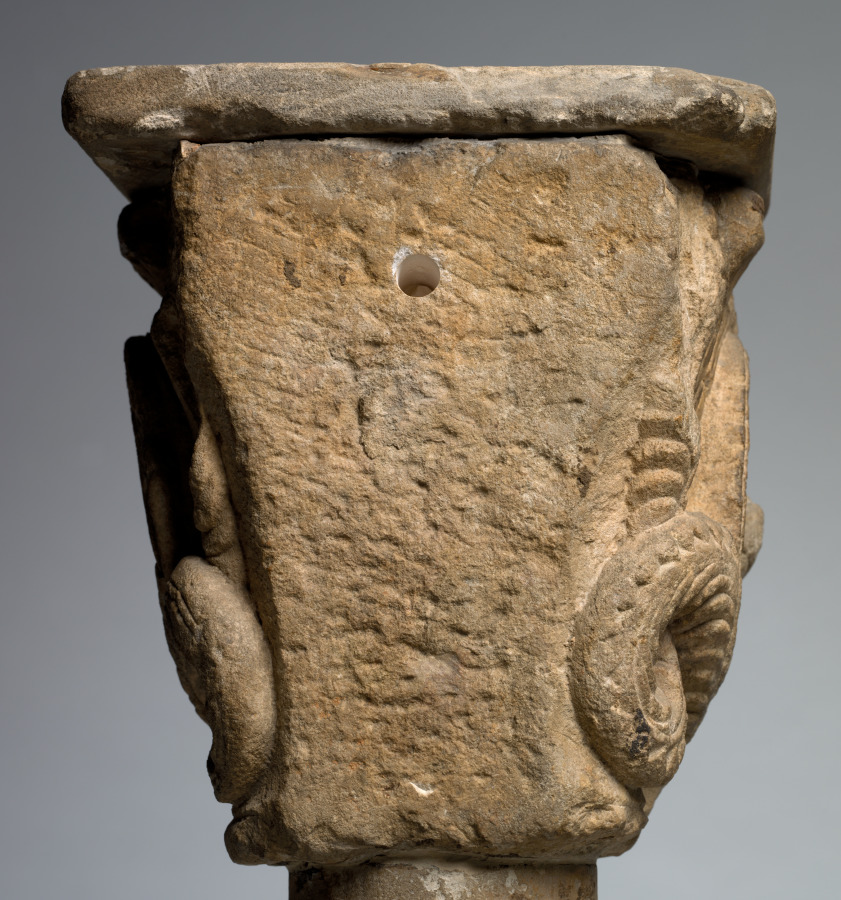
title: Engaged Capital with Birds and Dragons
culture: Western France, Bordelais or Dordogne, late 12th Century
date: late 1100s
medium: limestone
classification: Sculpture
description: Monstrous images were prevalent in the decoration of religious buildings during the Middle Ages. Such images must have impressed, perhaps even terrified, the monks and visitors who spent much of their time within the cloister or church, a place of prayer, contemplation, and reflection. Scholars have speculated how such images would have been received by the people given the ubiquity of monsters in medieval society. The carved monsters, often symbolizing vice and retribution for sin, were possibly designed to provoke a range of emotional responses including laughter, wonder, surprise, fear, and shock. This striking imagery must have had a strong impact, which in turn led Saint Bernard of Clairvaux (1090–1153), the spiritual head of the Cistercian order, to admonish their use as distracting from prayer.